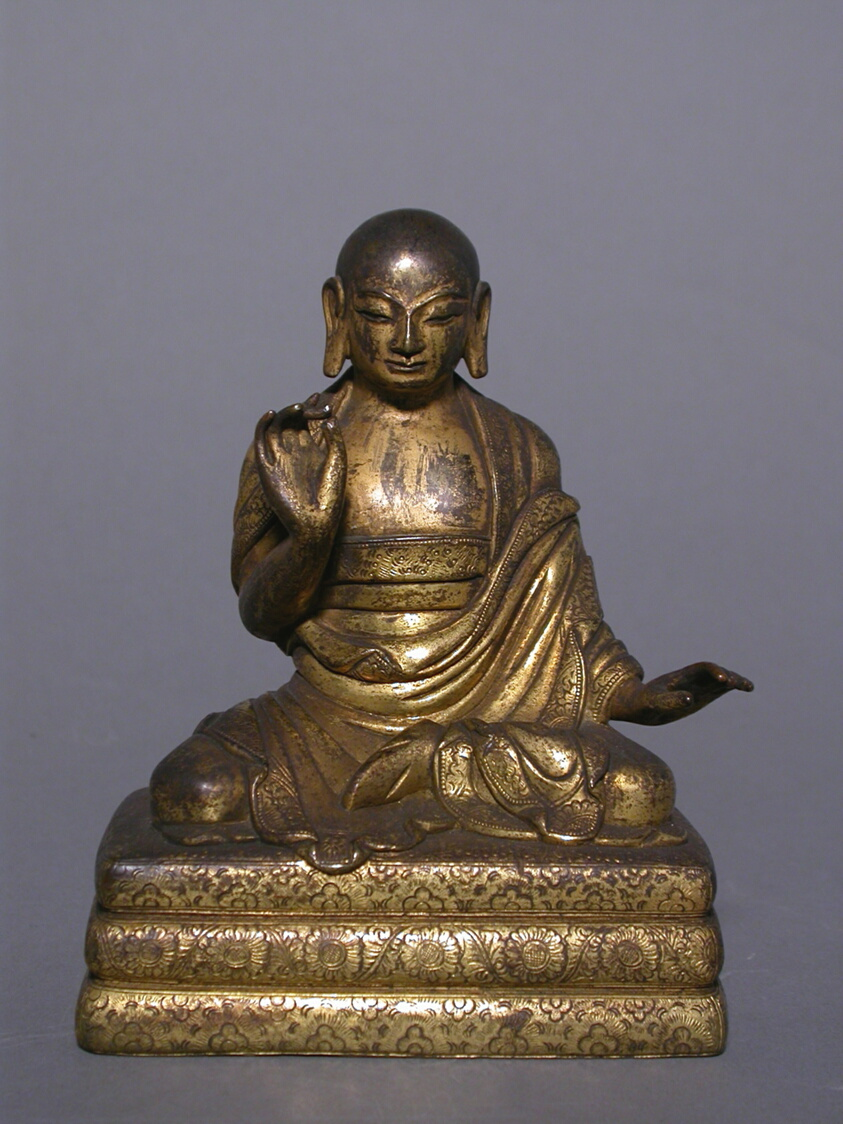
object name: Sculpture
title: One of the 18 Luohan (Arhats)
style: Chinese (culture or style)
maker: China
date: Qing dynasty (1644–1911), 18th century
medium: Brass alloy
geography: China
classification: brass; metal; sculpture; asian art